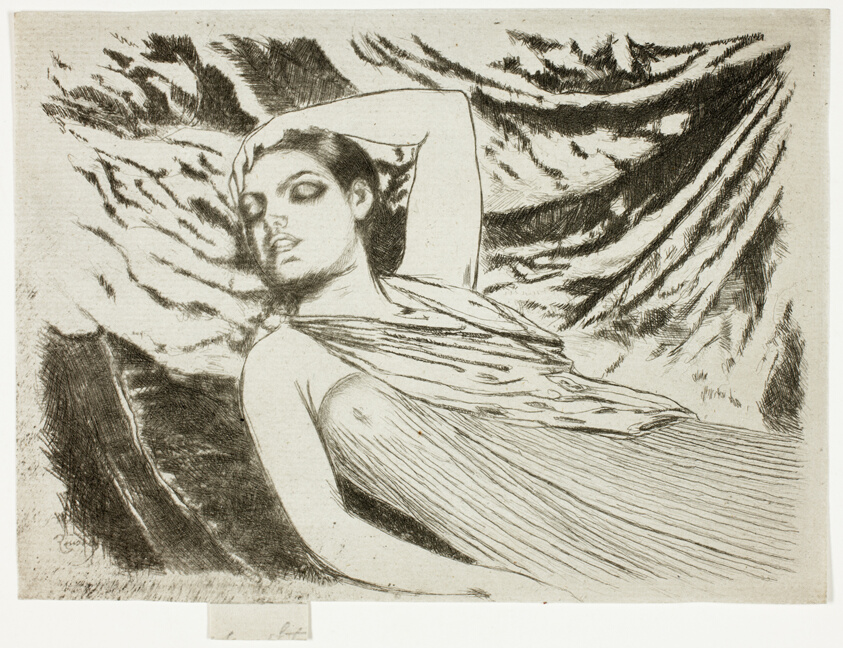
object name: Print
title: The Sleeping Model or The Sleeper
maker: Theodore Roussel (French, worked in England, 1847-1926)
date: 1890–97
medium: Etching and drypoint in black on ivory laid paper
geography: England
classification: etching; paper; print; prints and drawing